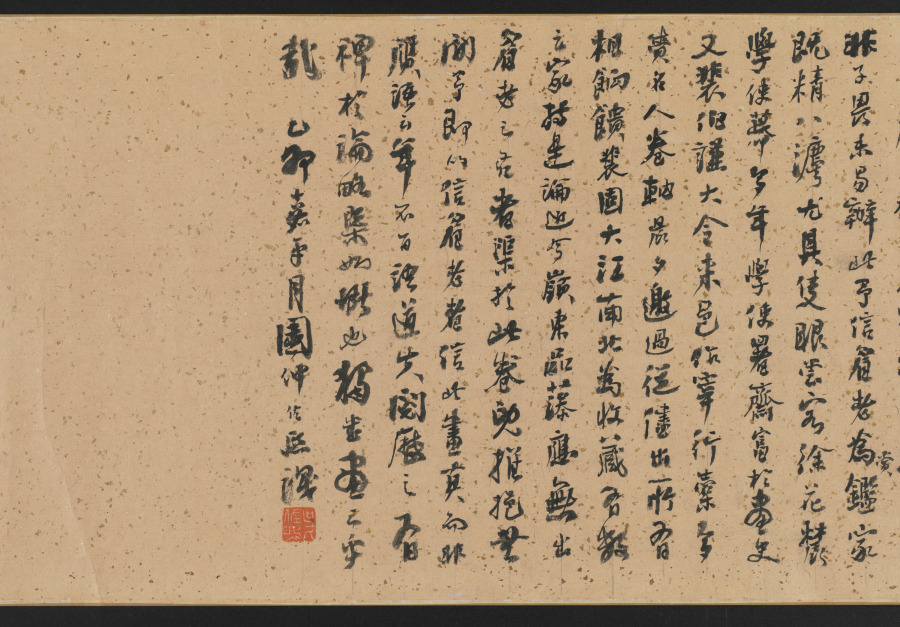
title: Scholar-Hermits in the Autumn Mountains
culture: China, Ming dynasty (1368–1644)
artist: Tang Yin (Chinese, 1470–1523)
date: 1500–1510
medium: handscroll, ink and light color on silk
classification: Painting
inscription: Artist's signature and 2 seals at end of scroll: Tang Yin [seals] T'ang Po-hu; T'ang Tzu'wei t'u-shu.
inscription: Title on frontispiece by Li Cho-kung (dates unknown).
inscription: 1 colophon and 11 additional seals: 1 colophon dated 1915 of Wu Tso-hsi (19th-20th c.); 2 seals of Gao Qifeng 高奇峰 (1889–1933); 5 seals of C. C. Wang 王季遷 (1907–2003); 4 seals unidentified.